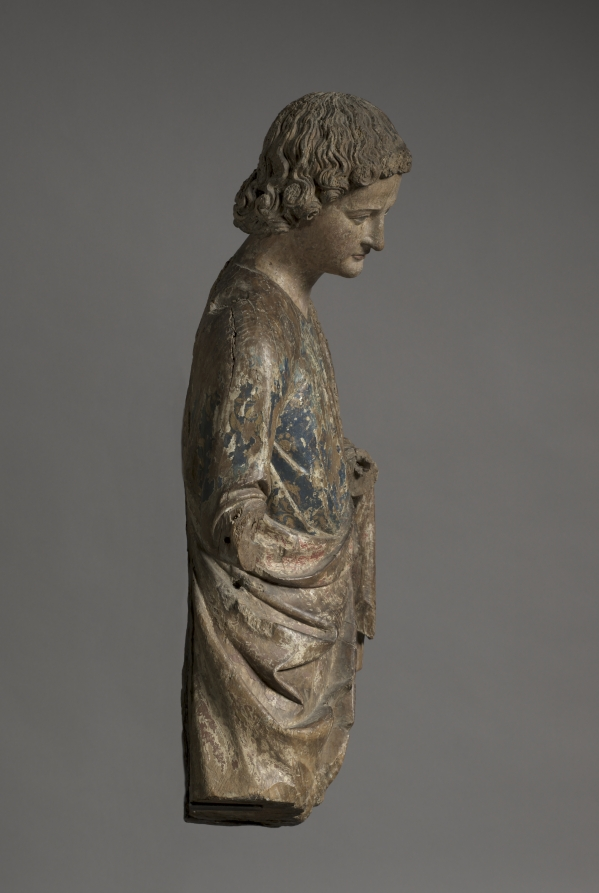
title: Angel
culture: France, vicinity of Reims, 13th century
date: c. 1250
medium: walnut with traces of gilding and polychromy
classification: Sculpture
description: Surviving in fragmentary condition, this pair of angels lacks lower arms, hands, wings, and attributes. Their original paint and gilding, now almost entirely lost, once rendered their garments a rich brocade and their hair a luxuriant gold. Nonetheless, in their graceful poses and sublime faces—which may portray tragic interest, anguish, or deep concern—their original delicacy and power are still evident. They embody the monumental style of 13th-century High Gothic cathedral sculpture in France. Their style specifically suggests they were carved in or around Reims, possibly by sculptors associated with the cathedral there. Their original placement is unknown, but they may have flanked an altar on columns.